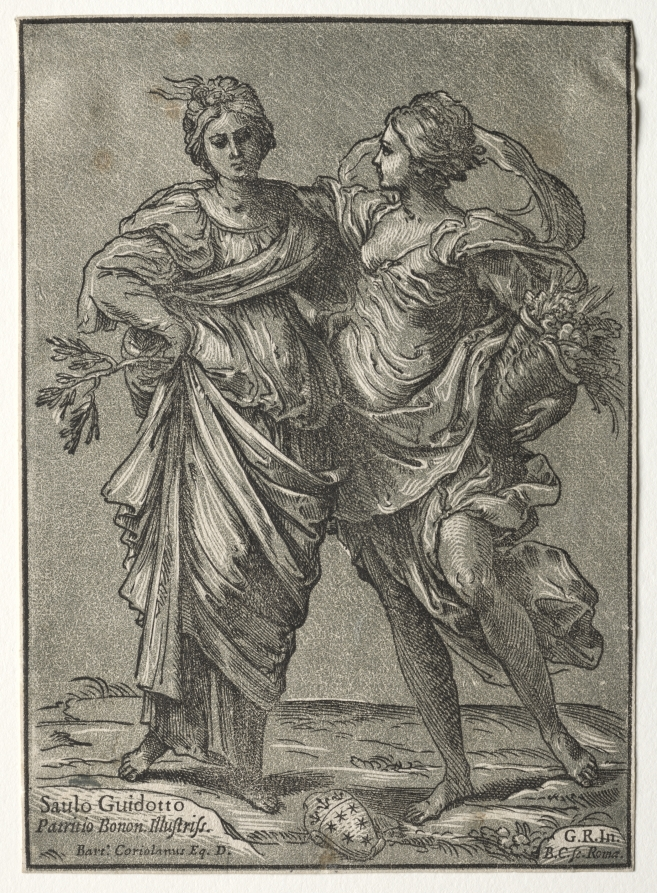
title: Alliance of Peace and Abundance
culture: Italy, 17th century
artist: Bartolommeo Coriolano (Italian)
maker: after Guido Reni (Italian, 1575–1642)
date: 1642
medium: chiaroscuro woodcut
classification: Print